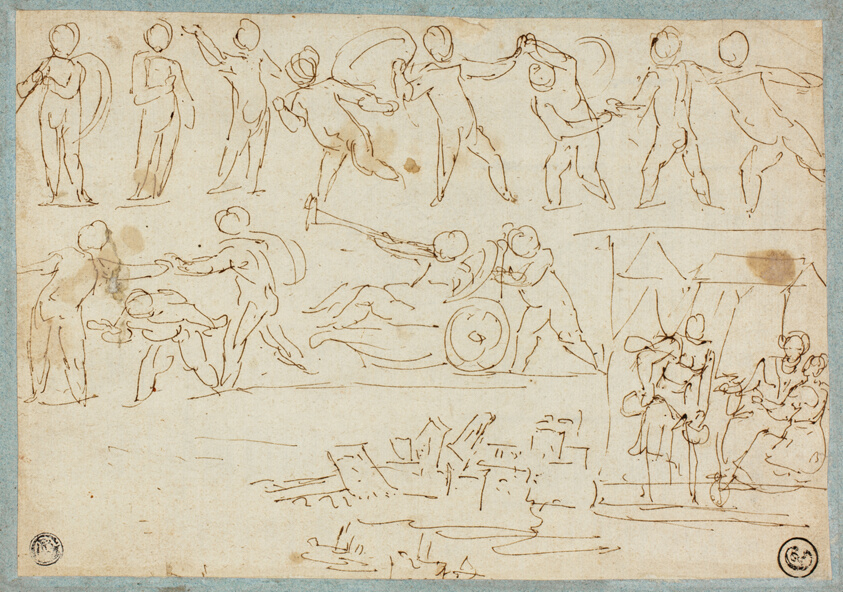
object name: Drawing and Watercolor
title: Frieze of Putti, Sketch of Lot and His Daughters, Sketch of Buildings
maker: Attributed to Agostino Carracci (Italian, 1557-1602); or Annibale Carracci (Italian, 1560-1609)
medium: Pen and brown ink on ivory laid paper, laid down on blue laid paper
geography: Italy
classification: pen and ink drawings; paper; drawings (visual works); prints and drawing